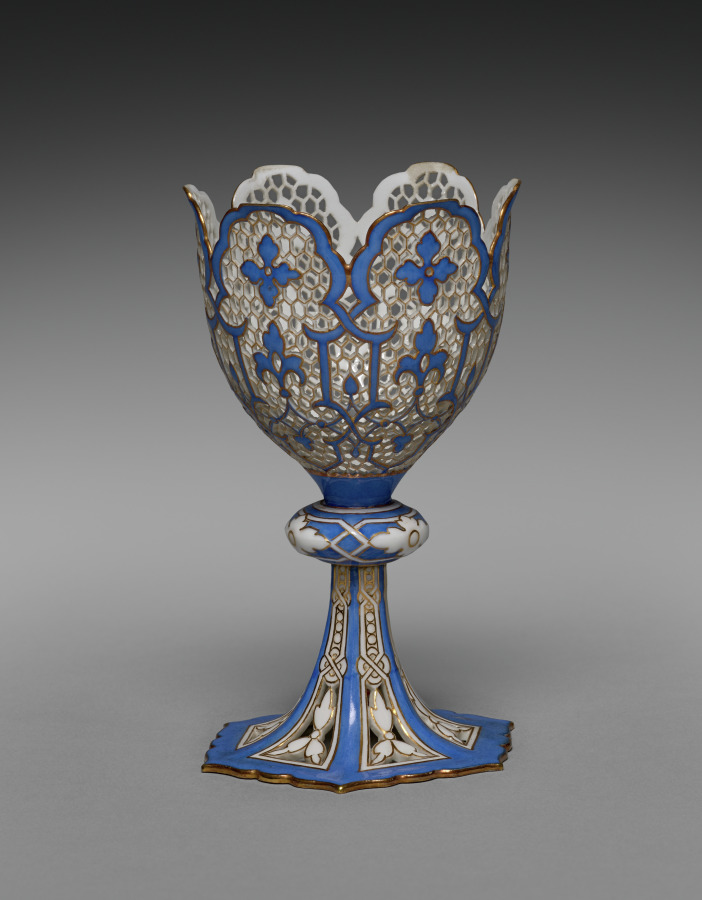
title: Cupholder (Zarf)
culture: France, Sèvres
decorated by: Guyonnet (French)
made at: Sèvres Porcelain Factory (French, est. 1756)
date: c. 1848–55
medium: hard-paste porcelain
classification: Ceramic